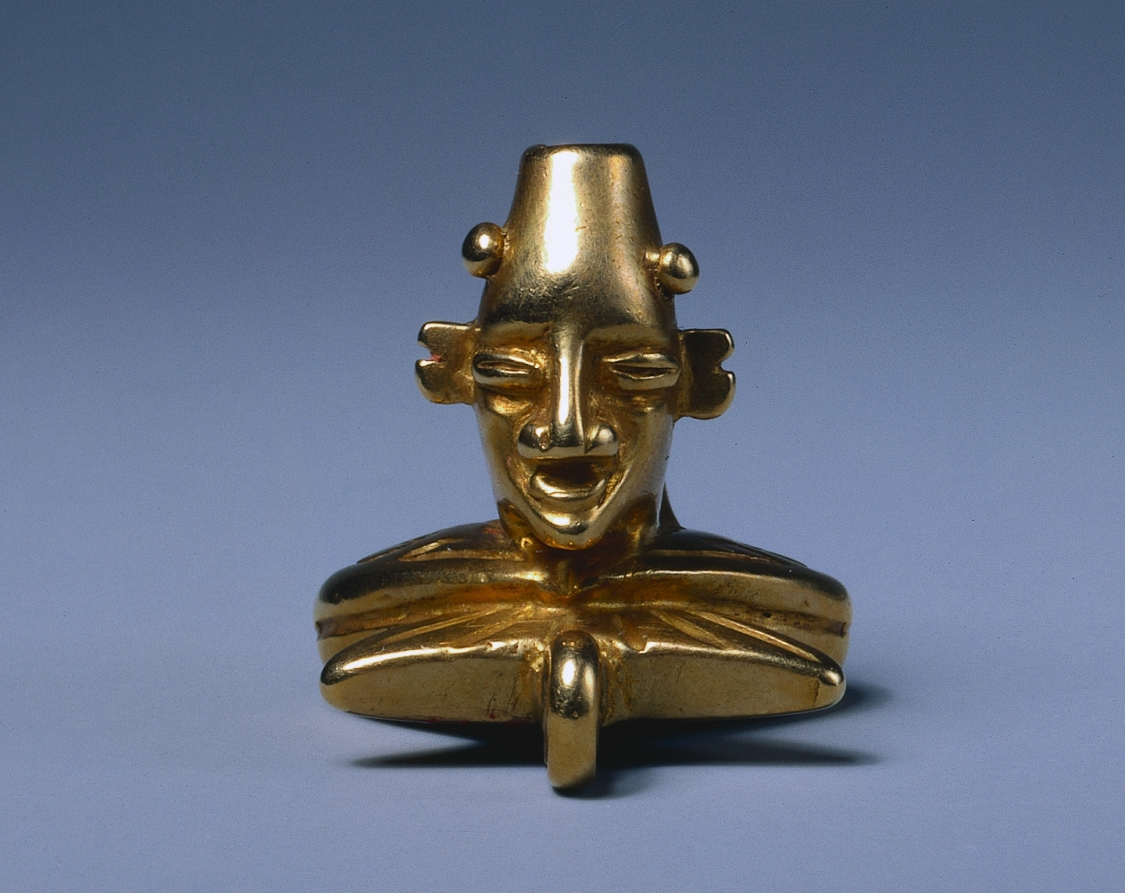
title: Pendant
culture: Panama, International Style, 5th-7th century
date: 400–700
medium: cast gold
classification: Metalwork